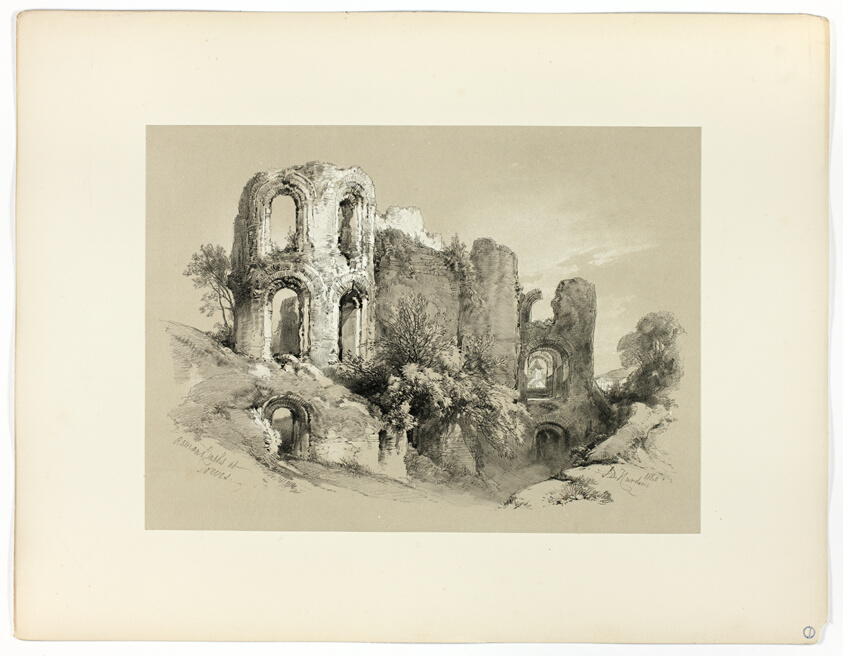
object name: Print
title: Roman Baths at Treves, from Picturesque Selections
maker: James Duffield Harding, (English, 1798-1863); Published by W. Kent and Co.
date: 1860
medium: Lithograph on paper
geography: England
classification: lithograph; print; prints and drawing